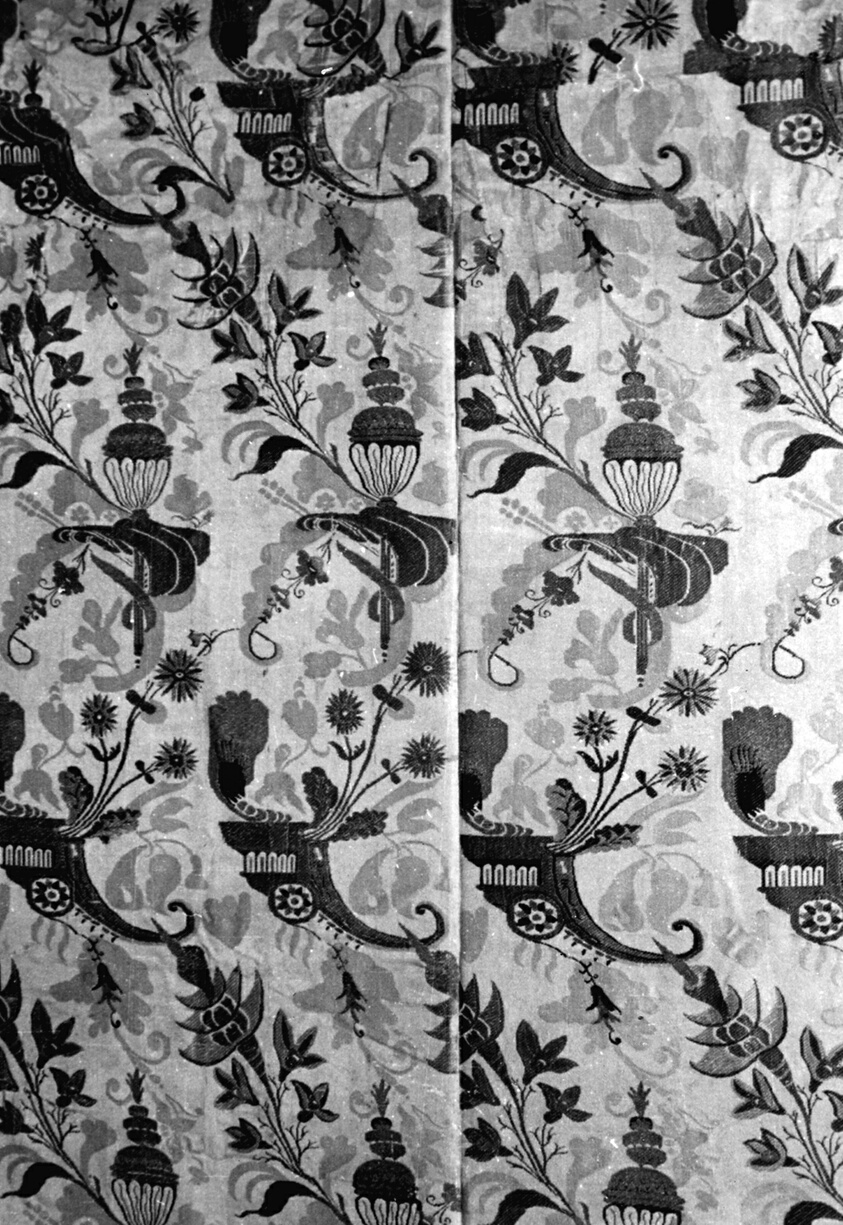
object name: Textile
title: Panel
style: "bizarre" style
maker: England or France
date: c. 1707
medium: Silk and gilt-metal-strip-wrapped silk, satin weave with supplementary brocading wefts bound in twill interlacing and self-patterned by reversing of faces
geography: England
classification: textile; weaving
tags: Floating Gardens